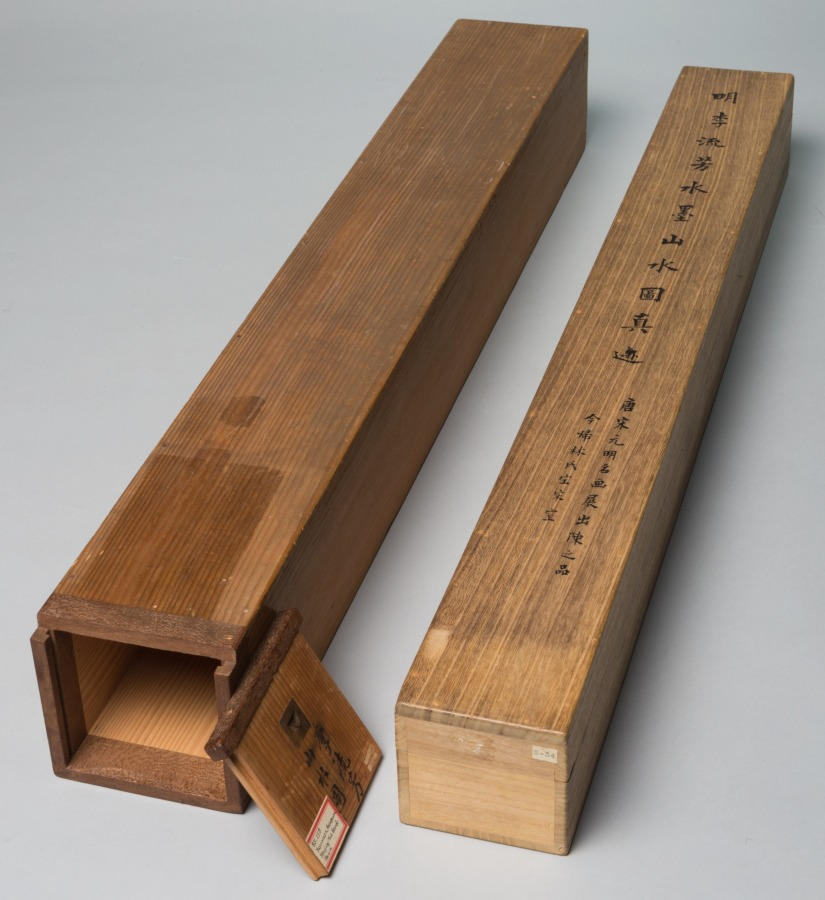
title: Playing the "Hand Game"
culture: Japan, Edo period (1615–1868)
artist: Hasegawa Yasumasa (Japanese)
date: c. 1760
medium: hanging scroll; ink and color on paper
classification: Painting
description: This scene depicts three people playing a game in which three players make hand gestures simultaneously. The relationship among the gestures determines the winner. Known as hand games, during the eighteenth century they were popular in Japan among courtesans. In this version, the contestants use both hands, indicating a special variation such as the fox hand game, which features gestures for a fox, a village leader, and a hunter.